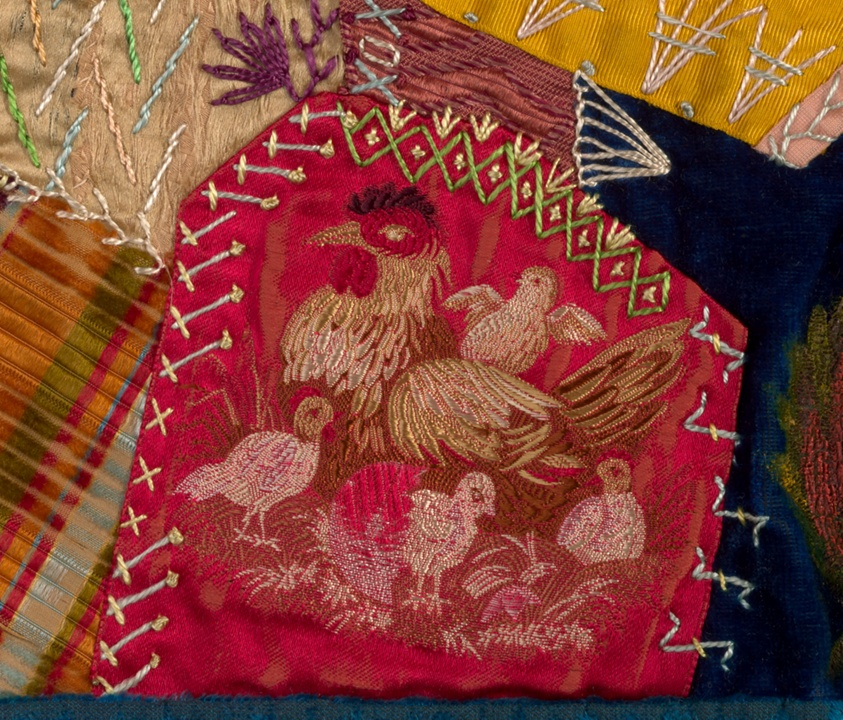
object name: Textile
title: Parlor Throw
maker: American, possibly Illinois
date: c. 1890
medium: Pieced, embroidered and painted “crazy” quilt; dyed and printed silk plain, satin, pile and patterned weave fabrics and ribbons; silk and metallic embroidery threads; paint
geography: Illinois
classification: needlework - quilt; textile